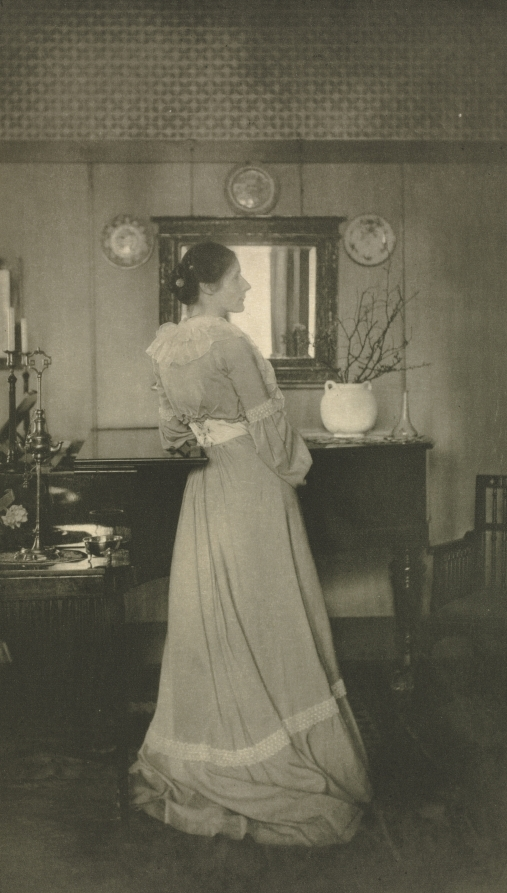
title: Camera Work: Portrait of Mrs. C.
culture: England, 20th century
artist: J. Craig Annan (British, 1864–1946)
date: 1907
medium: photogravure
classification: Bound Volume